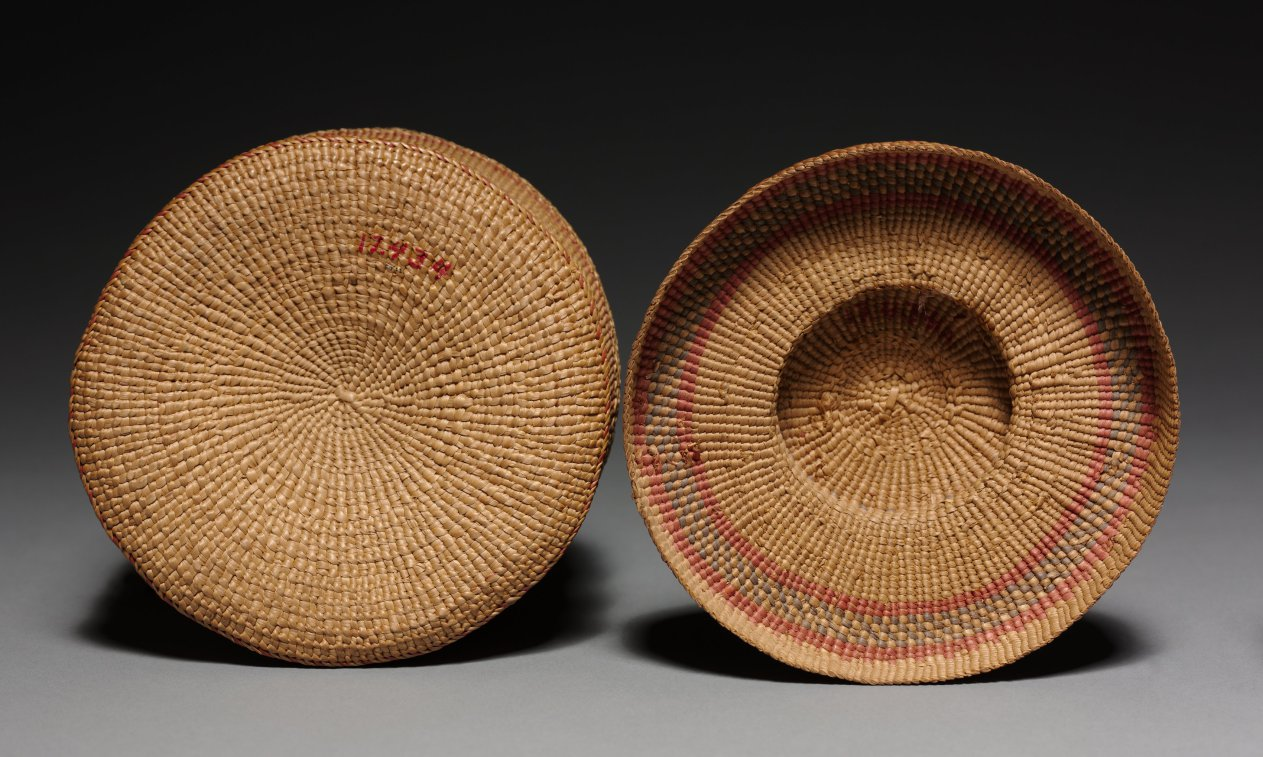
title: Covered Basket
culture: Northwest Coast, Haida, Unassigned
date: Unassigned, before 1917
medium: twilled, imbricated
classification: Basketry